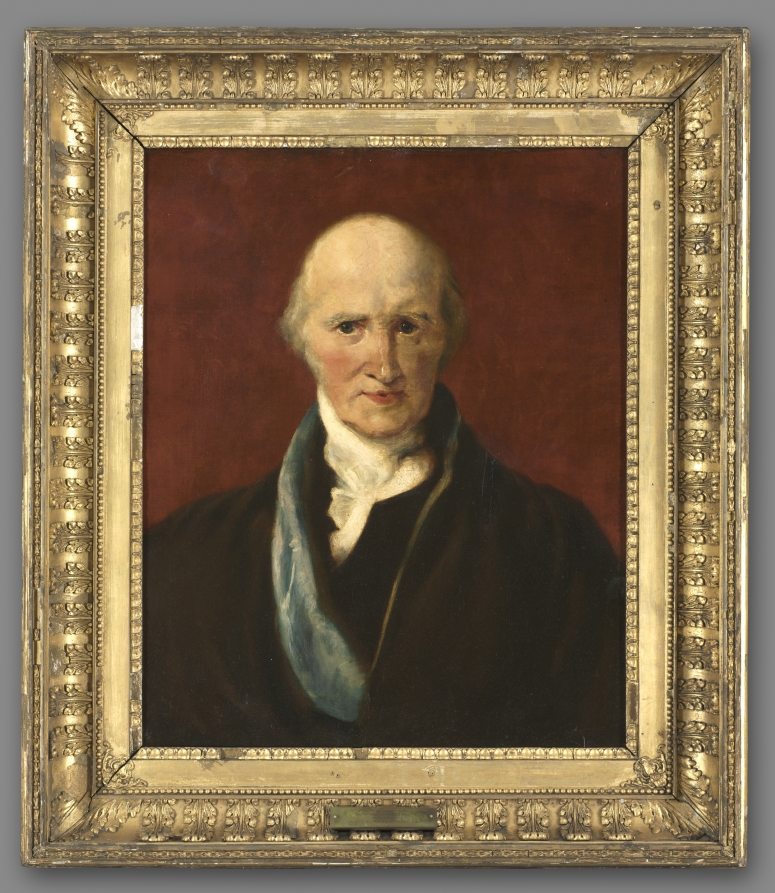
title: Portrait of Benjamin West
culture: England, 18th century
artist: copy after Thomas Lawrence (British, 1769–1830)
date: 1818 or later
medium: oil on canvas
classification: Painting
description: This bust-length portrait of the prominent American artist, Benjamin West, was allegedly painted by Thomas Lawrence. Although its attribution remains uncertain, the portrait's style and execution recalls other portraits of West by Lawrence, including the full-length painting now in the National Gallery, London. This smaller version may have been created when West was at an advanced age, and no longer able to stand for extended periods of time. However, as an exact, yet more freely painted likeness of the London portrait, this version also may be a copy made by Lawrence or one of his pupils after the full-length version.